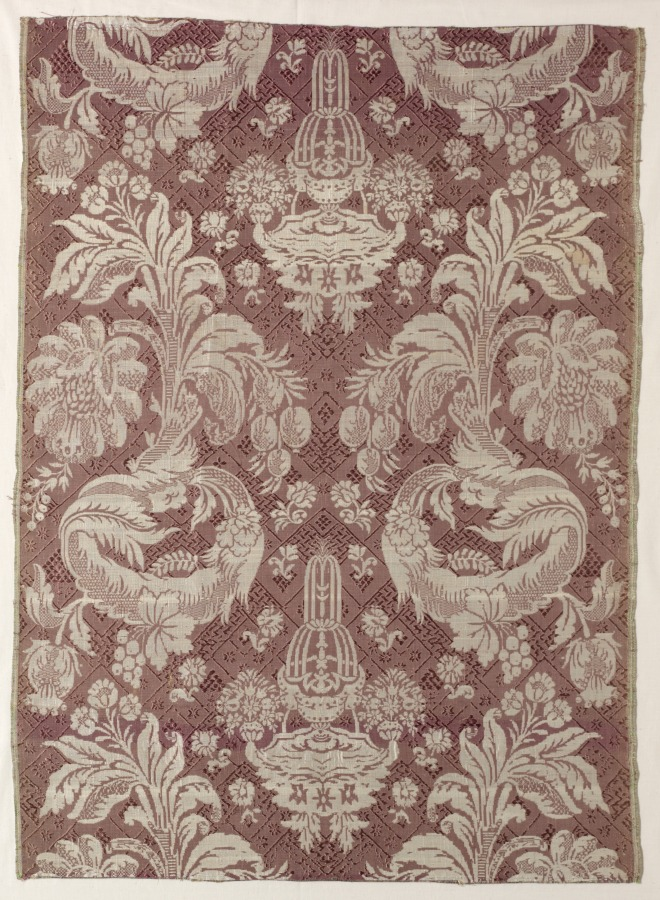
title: Lengths of Textile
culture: France or Italy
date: early 1700s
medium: silk with supplementary weft brocading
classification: Textile